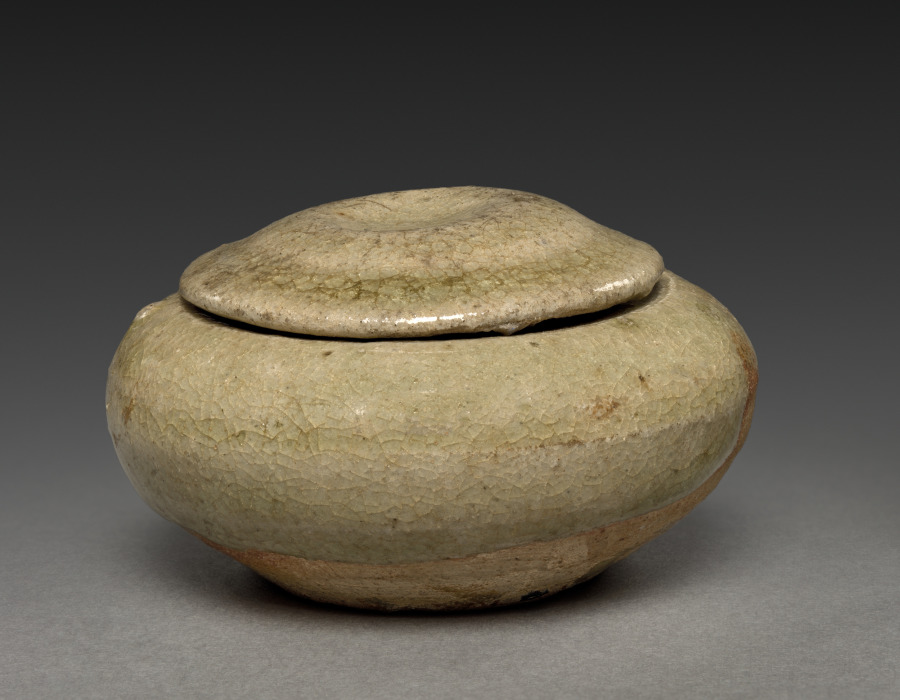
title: Incense Box: Seto Ware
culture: Japan, Kamakura period (1185–1333)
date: 1200s–1300s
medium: glazed stoneware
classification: Ceramic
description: Old Seto, also called Koseto ware, was typically coated with an ash glaze in the mineral feldspar, which produced a yellow or grayish-green glaze. This palette appealed to medieval Buddhist priests and samurai alike. The practice of burning incense in religious, court, and domestic settings dates from the early 700s in Japan.